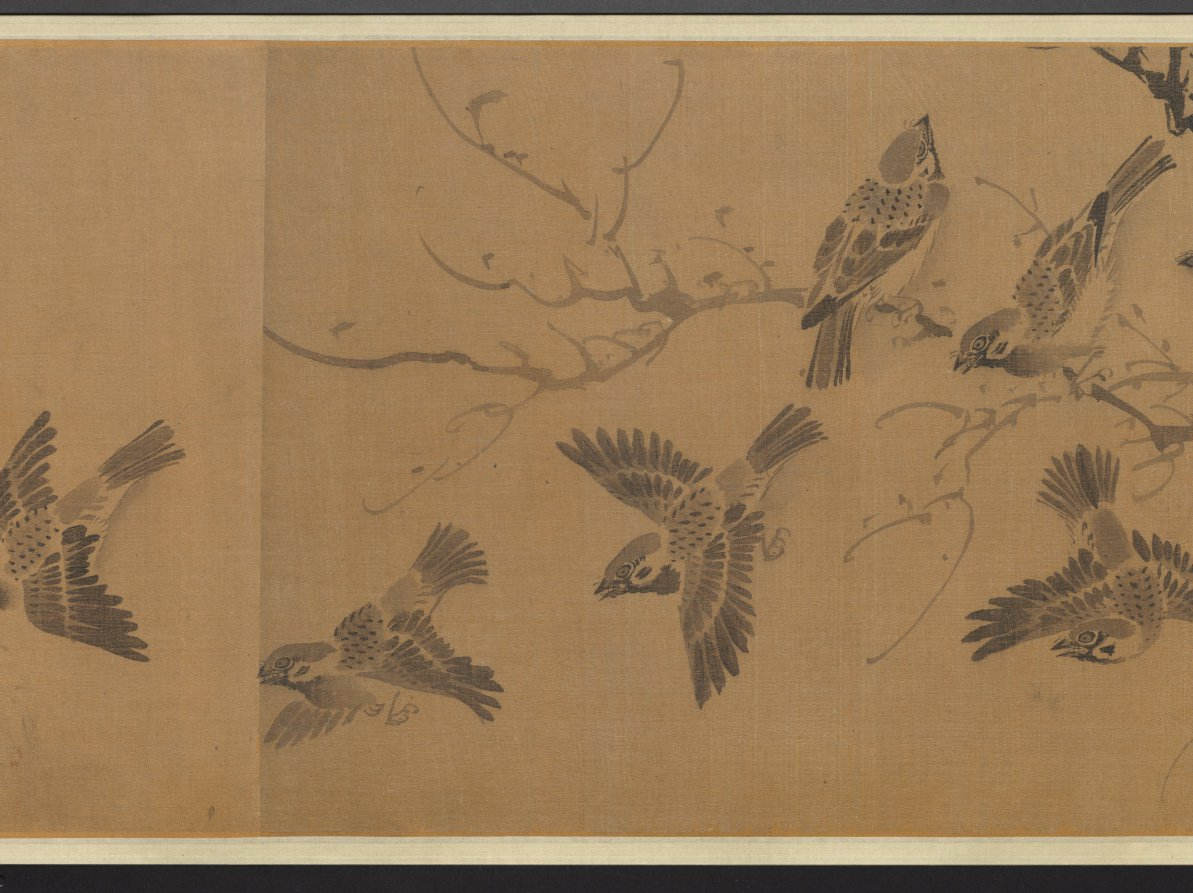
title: A Hundred Sparrows in a Lofty Grove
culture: China, Ming dynasty (1368–1644)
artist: attributed to Lin Liang (Chinese, 1416–1480)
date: 1368–1644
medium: handscroll; ink on silk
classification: Painting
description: Sparrows engaged in all kinds of activities frolic amid leafy branches, blades of grass, rocks, and a waterfall. As our eyes move over the scroll, the artist engages us in enjoying the sparrows’ carefree movements in a natural setting. The charming birds were painted from close observation in swift and fluent brushstrokes. Sparrows are a common bird and in Chinese painting they often represent the commoner in human society as opposed to the noble pheasant or peacock representative of the ruling class.